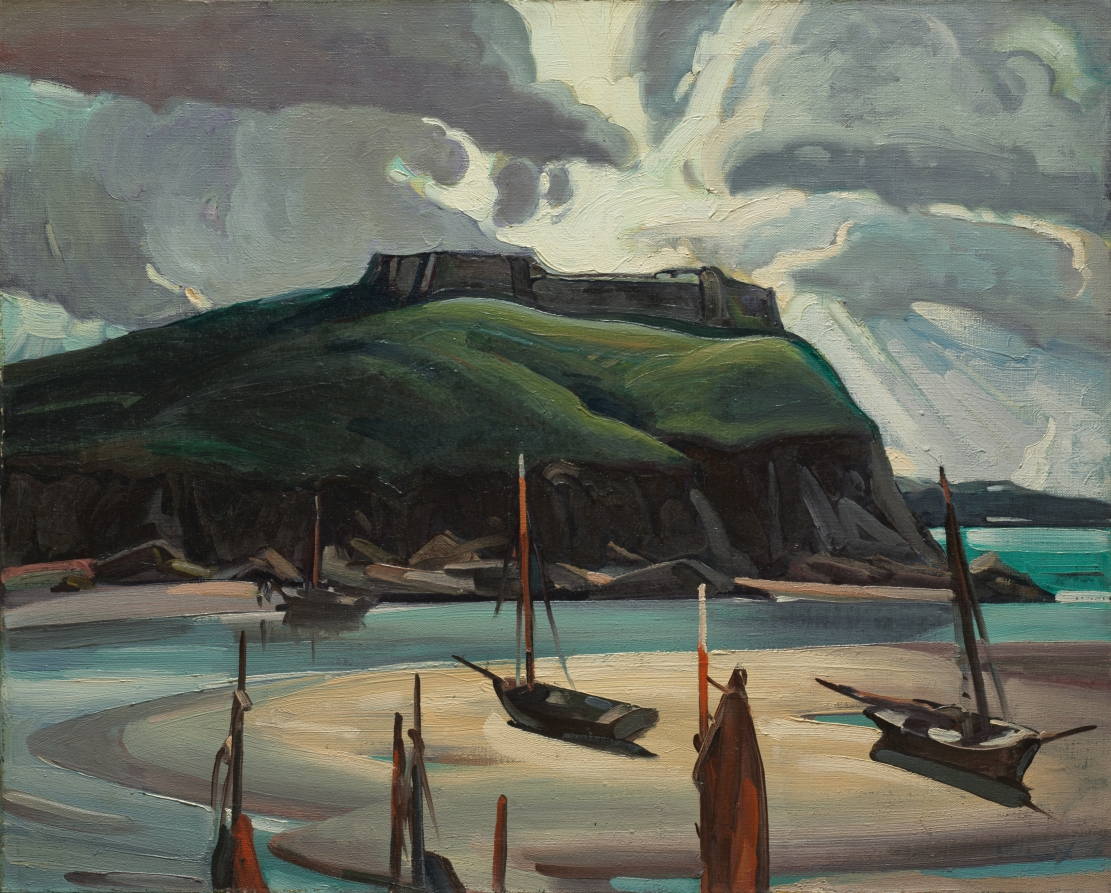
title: St. Servan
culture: America, Ohio, Cleveland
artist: Frank Wilcox (American, 1887–1964)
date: 1926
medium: oil on canvas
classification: Painting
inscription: signed lower left: "Wilcox 26"